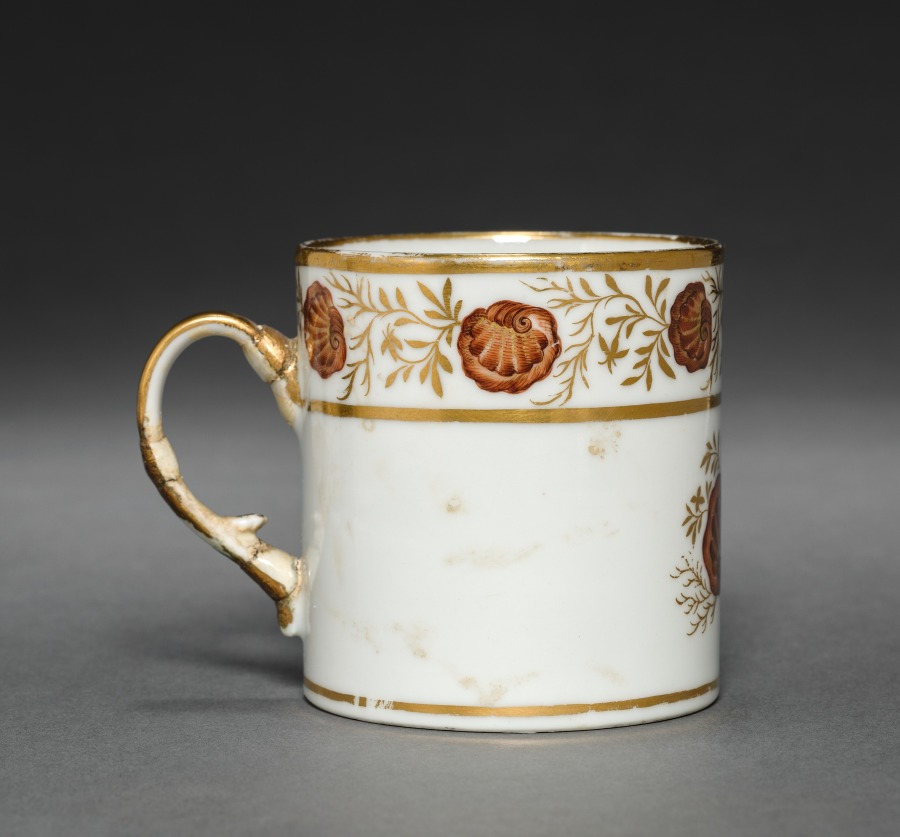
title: Cup from Oliver Wolcott, Jr. Tea Service (6 of 6)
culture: Chinese Export porcelain, late 18th-early 19th century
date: 1785–1805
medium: porcelain, sepia enamel, gold leaf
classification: Ceramic